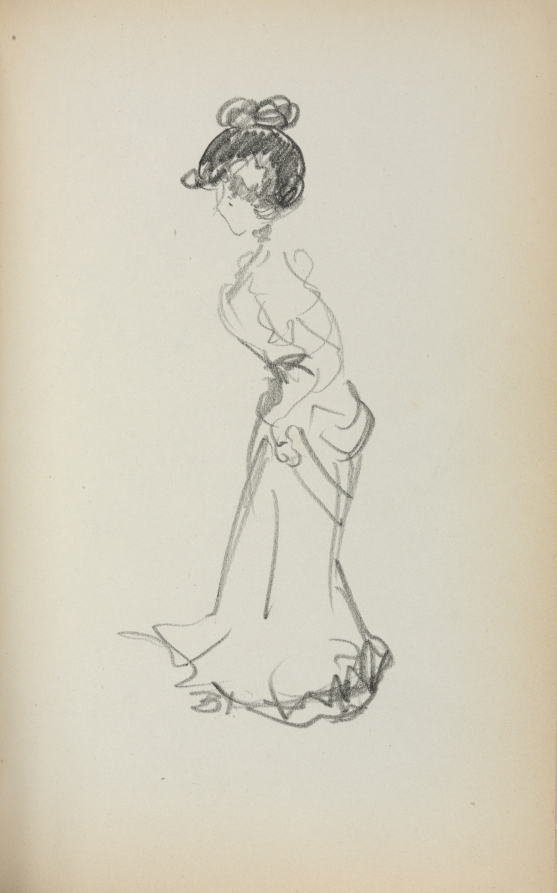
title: Italian Sketchbook: Standing Woman (page 167)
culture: America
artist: Maurice Prendergast (American, born Newfoundland [now Canada], 1858–1924)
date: 1898–1899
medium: pencil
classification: Bound Volume